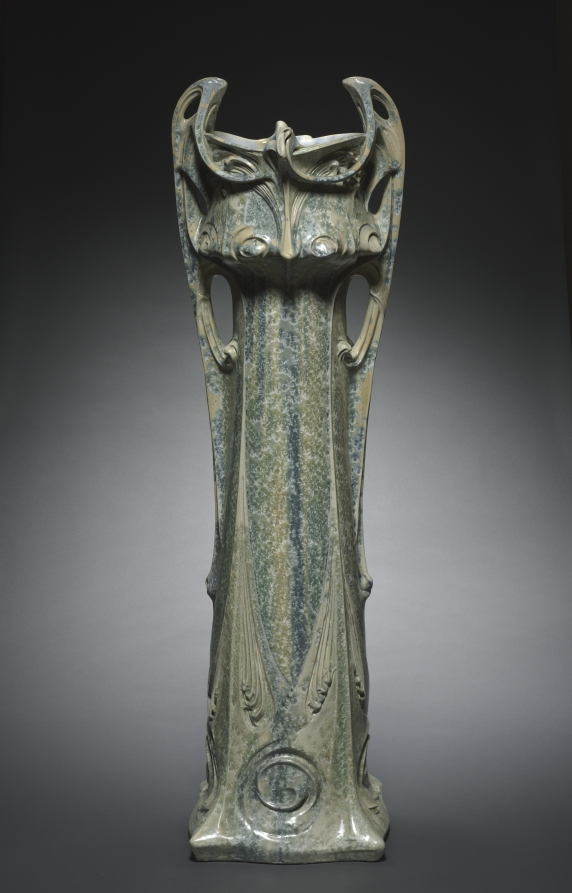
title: Vase des Binelles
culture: France, Sèvres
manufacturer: Sèvres Porcelain Factory (French, est. 1756)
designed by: Hector Guimard (French, 1867–1942)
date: 1903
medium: stoneware with crystalline glaze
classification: Ceramic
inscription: Gres 1903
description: In 1899, French architect Hector Guimard designed the Castle Henriette, built on Rue des Binelles in Sèvres, a suburb of Paris, France. This stoneware vase is named for the street and bears similarities to architectural features of Castle Henriette. The vase’s asymmetrical and curvilinear design showcases the trademarks of the Art Nouveau style. Five examples of the Vase des Binelles were made by the still-operating Sèvres Manufactory, whose ceramics were celebrated for their innovative decoration and design since its establishment in the mid-1700s.